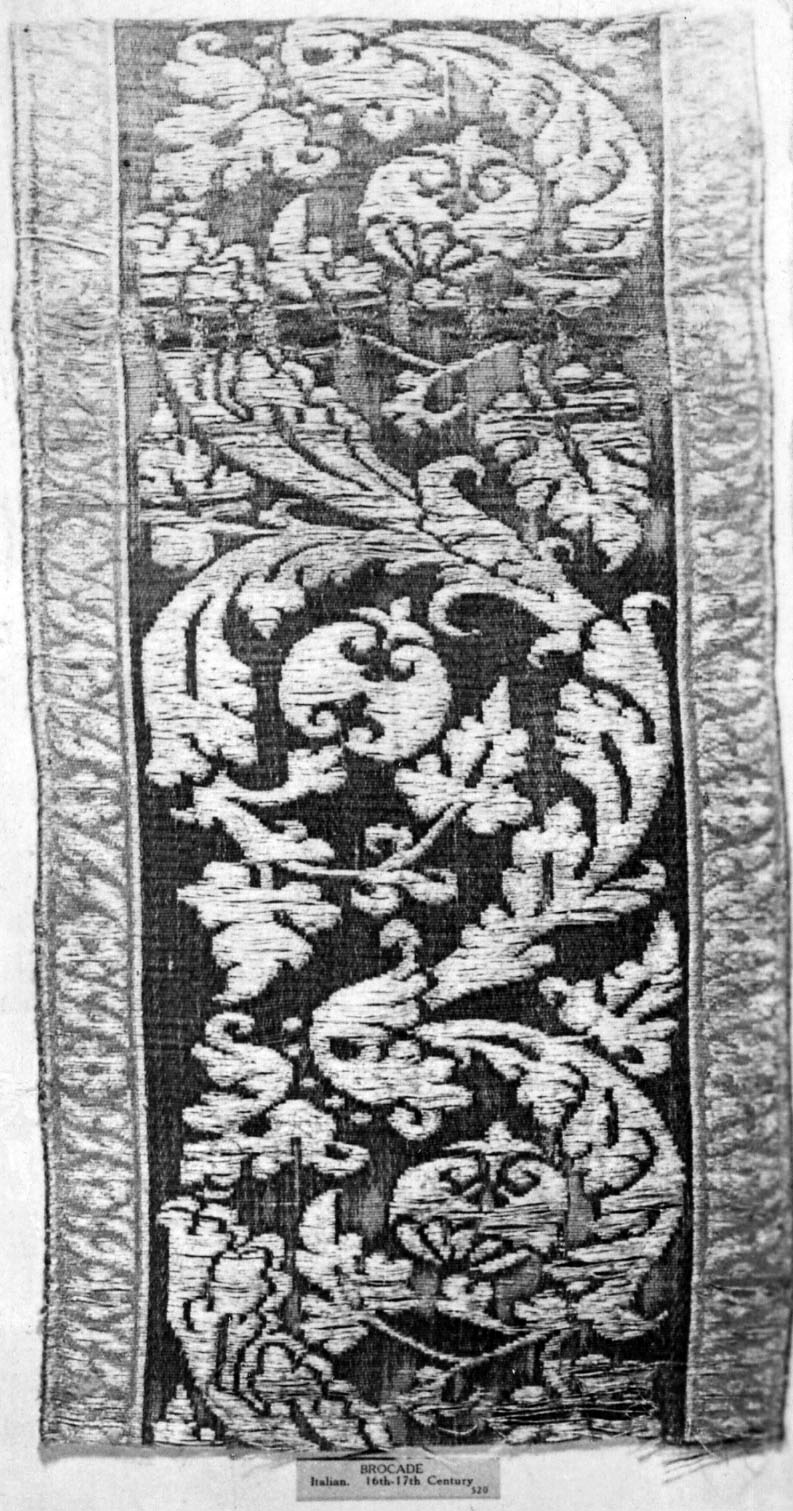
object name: Textile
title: Border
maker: Italy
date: 17th century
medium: plain compound satin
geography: Italy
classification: textile; weaving